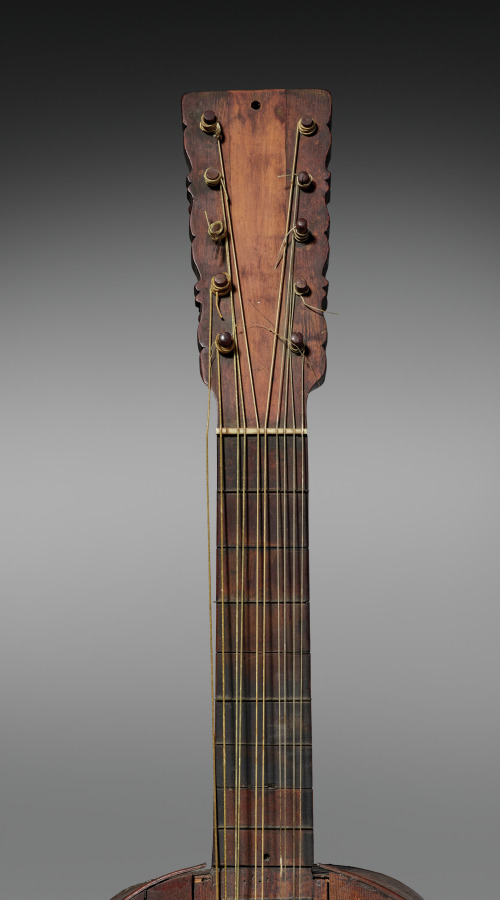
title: Chittara Battente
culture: Italy, 15th century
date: 1400s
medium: wood, paper?, sound hole, bone bridge, sheet metal inlay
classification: Musical Instrument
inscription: bears broken ticket of parchment.